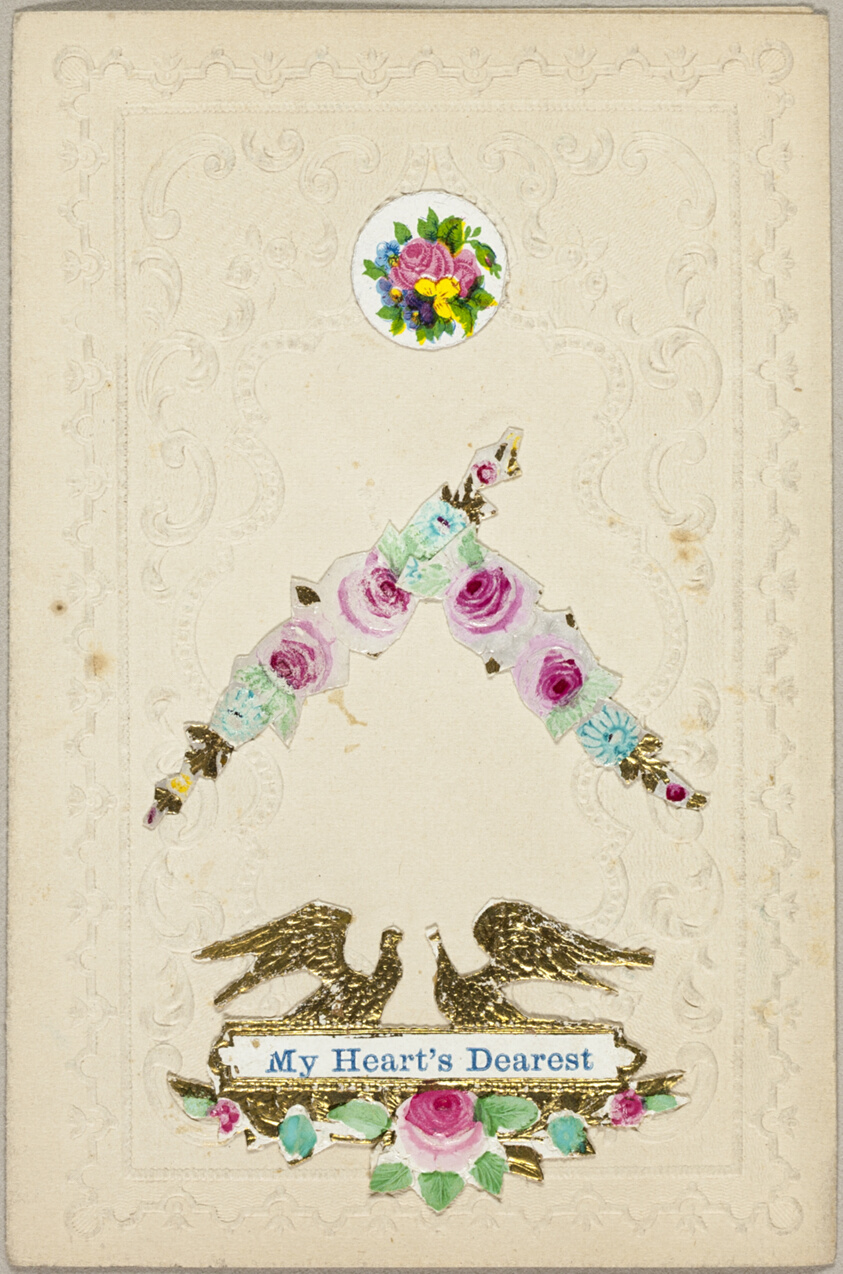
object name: Drawing and Watercolor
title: My Heart's Dearest (Valentine)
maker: Unknown Artist; American or English, 19th century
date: c. 1830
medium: Collaged elements on embossed ivory wove paper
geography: United States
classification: collage; valentine; prints and drawing; paper